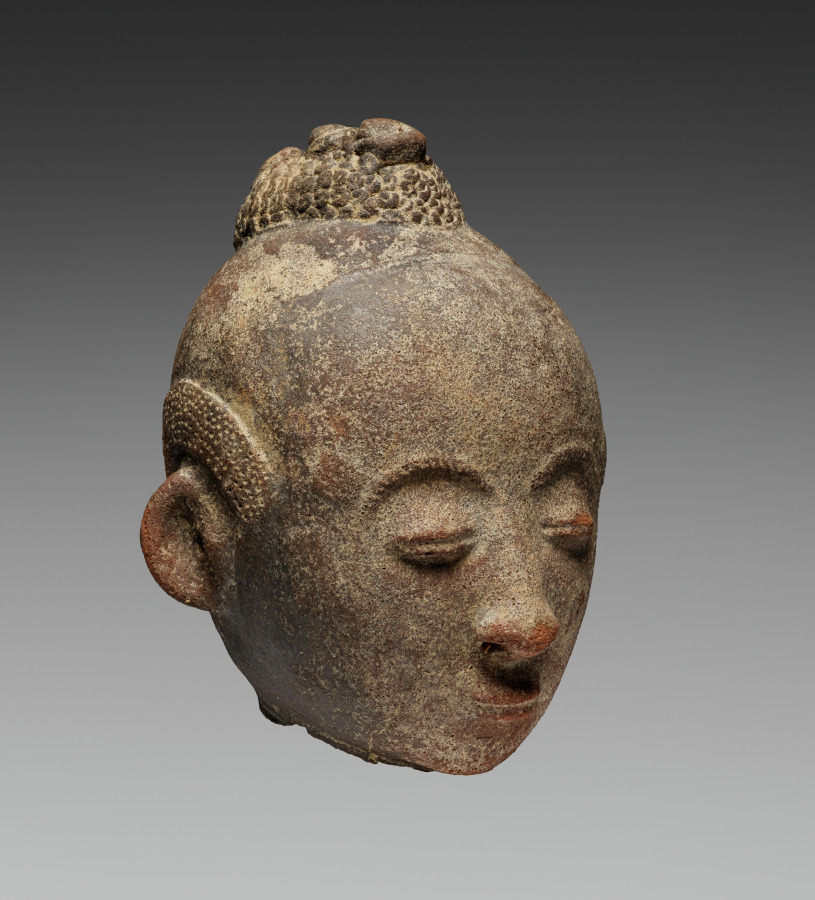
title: Memorial head (nsodie)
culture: Ghana, Akan-style sculpture, unknown female ceramicist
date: late 1600s–early 1700s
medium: Terracotta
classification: Sculpture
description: This is an idealized portrait of an Akan royal. The Akan states formed in West Africa around the 1400s. Akan royal family members commissioned terracotta portraits like this from female artists during someone’s life. Following their death and burial, the family placed these sculptures in a sacred grove. The woman who sculpted this head over 300 years ago worked from memory, without sketches. The resulting sculpture combined idealized physical qualities of elite figures with individual details. The hairstyle and skin color of this portrait reflect its subject’s individuality. In contrast, his calm expression reflects the desired “cool composure” of elites.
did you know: The woman who sculpted this head did so without making a sketch, working from her memory of the subject.